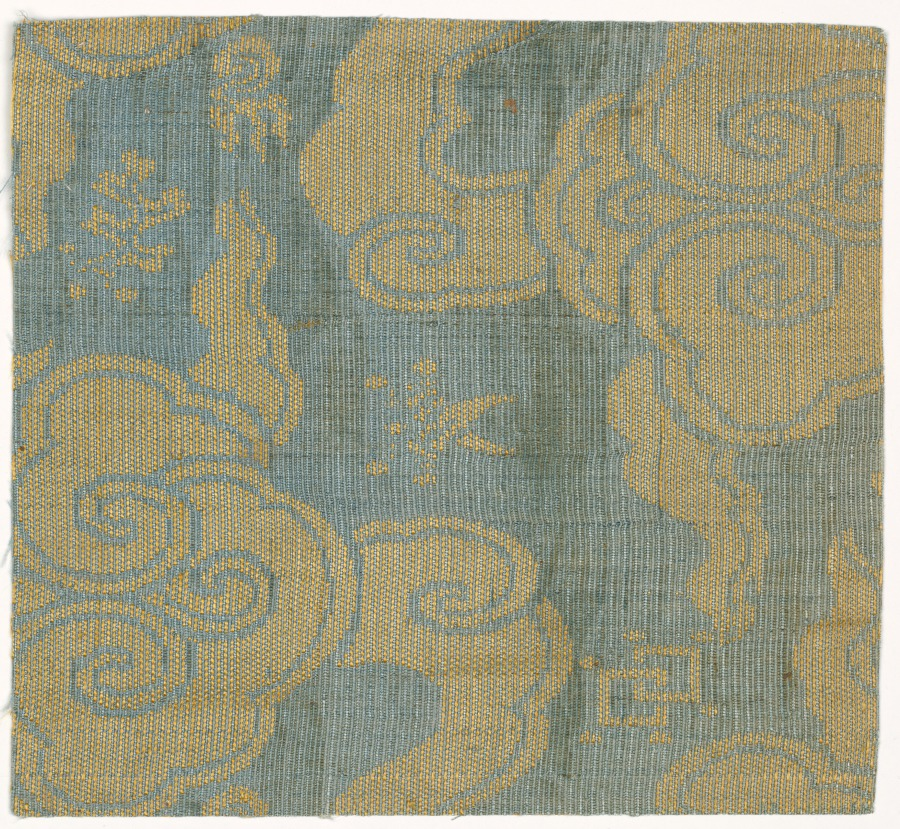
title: Fragment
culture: China, Qing dynasty (1644-1911)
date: 1680–1720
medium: silk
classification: Textile